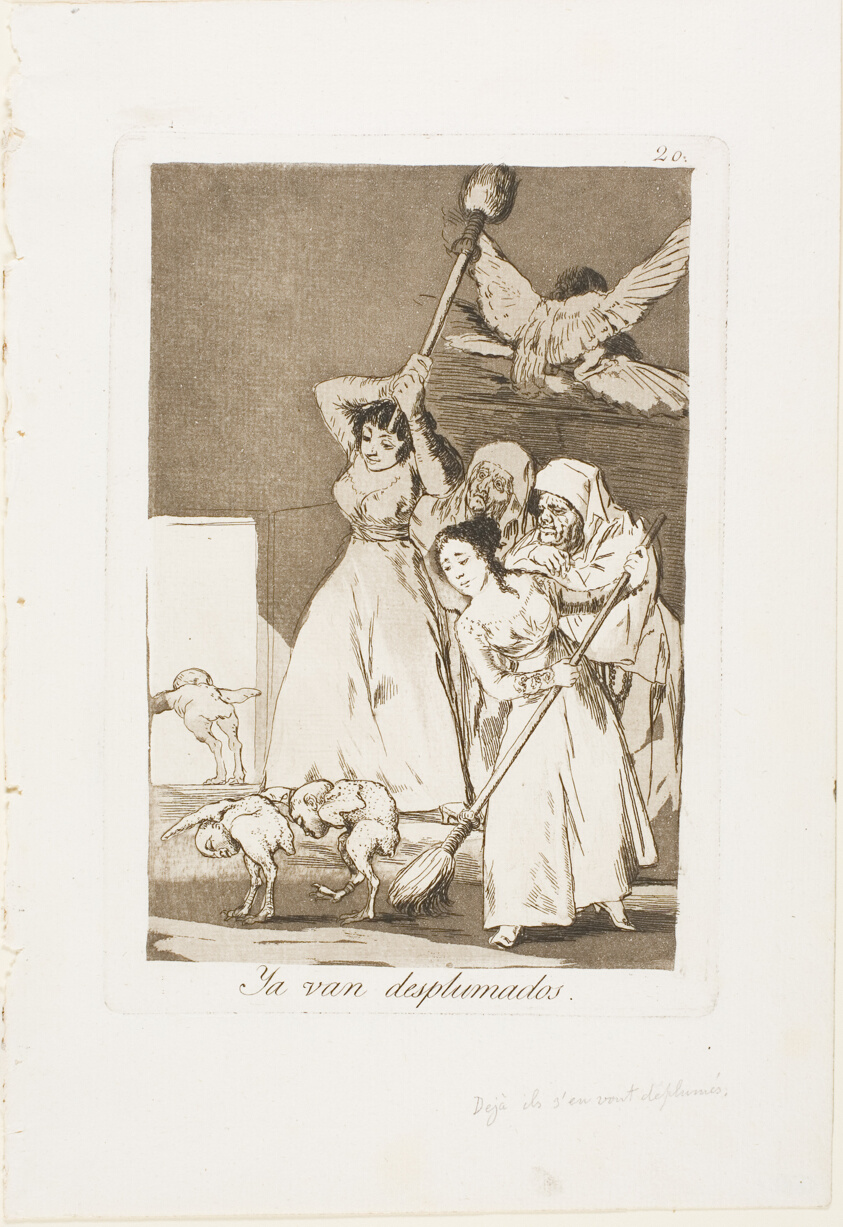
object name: Print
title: There They Go Plucked (i.e. fleeced), plate 20 from Los Caprichos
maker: Francisco José de Goya y Lucientes (Spanish, 1746-1828)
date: 1797/99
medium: Etching and aquatint on ivory laid paper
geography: Spain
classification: etching; print; prints and drawing